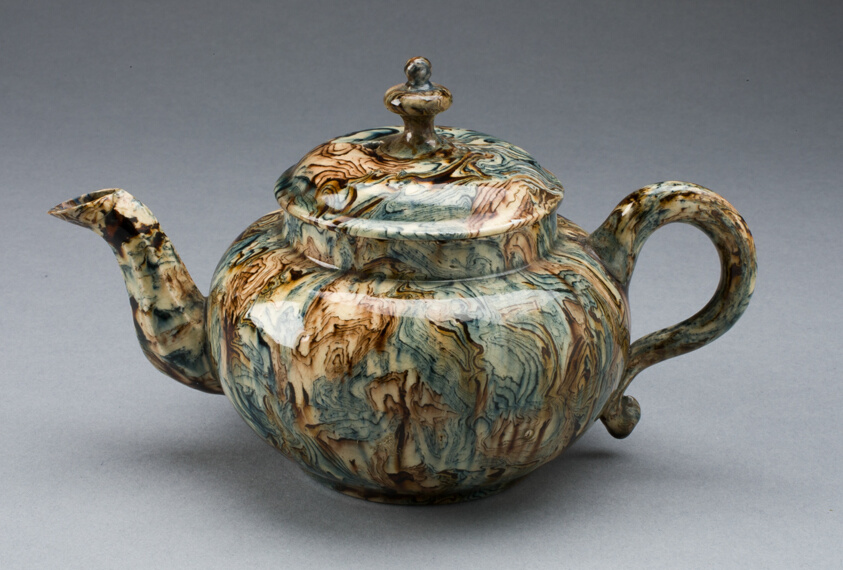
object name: Ceramics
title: Teapot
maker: Staffordshire, England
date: 1750/59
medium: Lead-glazed earthenware (agateware)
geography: Staffordshire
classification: teapot; lead-glazed earthenware; earthenware; ceramics; european decorative arts; agateware